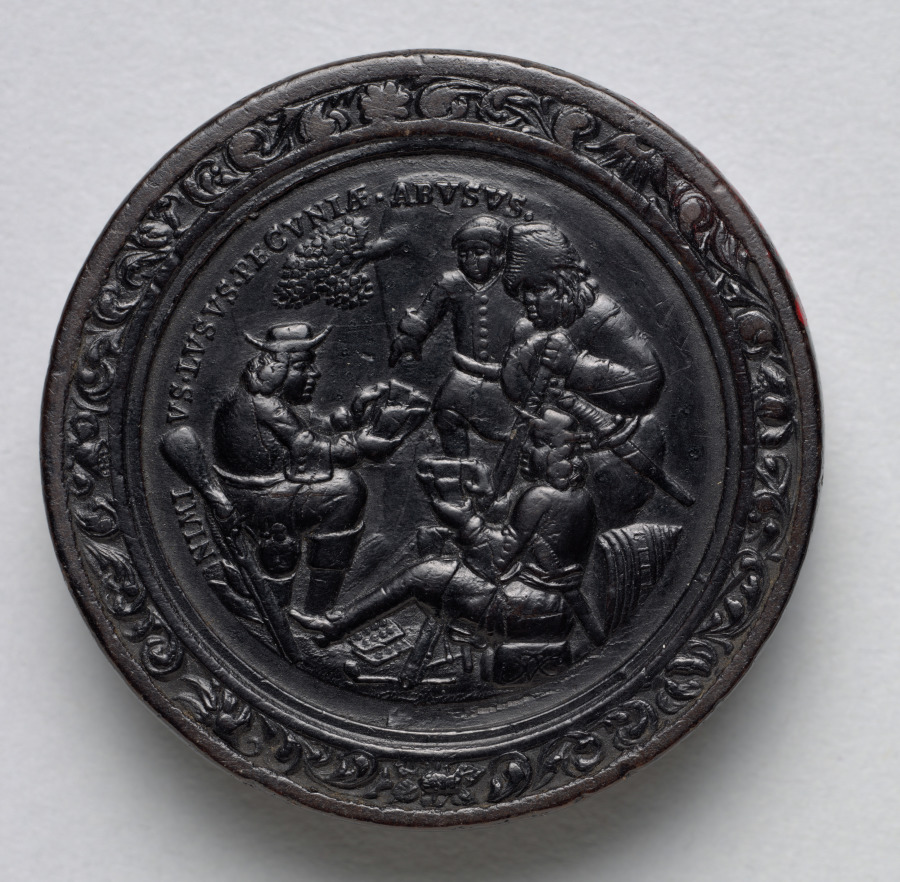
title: Gaming Piece (reverse)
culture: Germany, late 17th-early 18th Century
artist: Martin Brunner (German, 1659–1725)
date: c.1700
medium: wood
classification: Furniture and woodwork